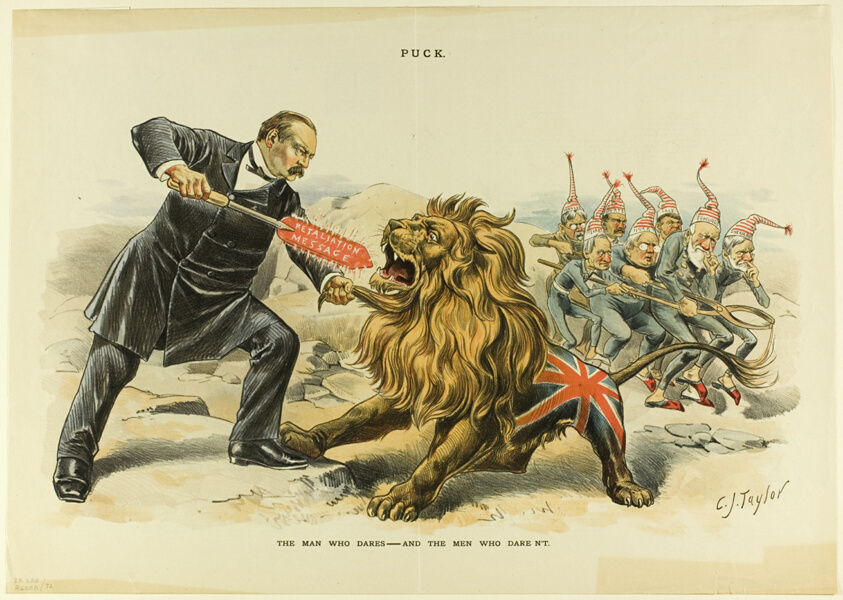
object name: Print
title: The Man Who Dares - and the Men who Dare N't, from Puck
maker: C. Jay Taylor (American, 1855-1929)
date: published September 5, 1888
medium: Color lithograph on newsprint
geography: United States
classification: lithograph; print; prints and drawing